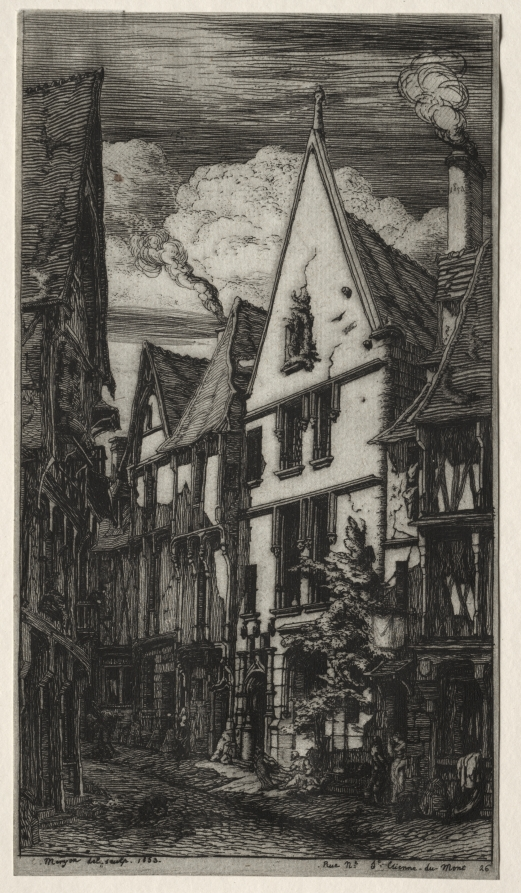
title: Rue des Toiles, Bourges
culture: France, 19th century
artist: Charles Meryon (French, 1821–1868)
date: 1853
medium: etching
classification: Print